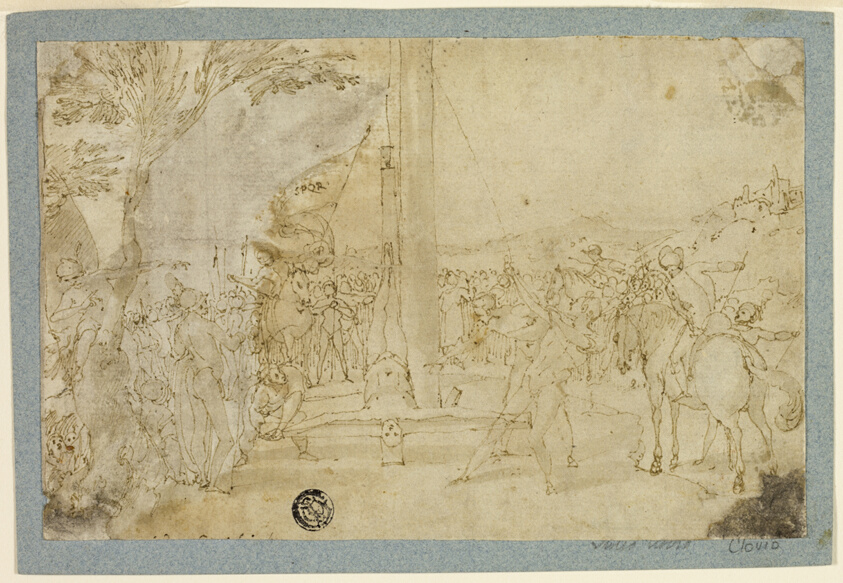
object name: Drawing and Watercolor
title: Martyrdom of Saint Peter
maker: Andrea Boscoli (Italian, c. 1560-1608)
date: 1598/99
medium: Pen and brown ink, with brush and gray wash, over traces of black chalk, on ivory laid paper, tipped on to light blue laid paper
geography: Italy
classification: pen and ink drawings; drawings (visual works); prints and drawing